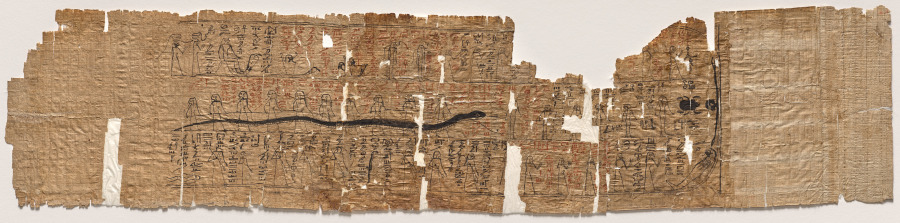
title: Book of Amduat, Perhaps of Bakenmut, with Elements of the Tenth through Twelfth Hours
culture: Egypt, Third Intermediate (1069–715 BCE), Dynasties 21–22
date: 1000–900 BCE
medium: papyrus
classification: Funerary Equipment